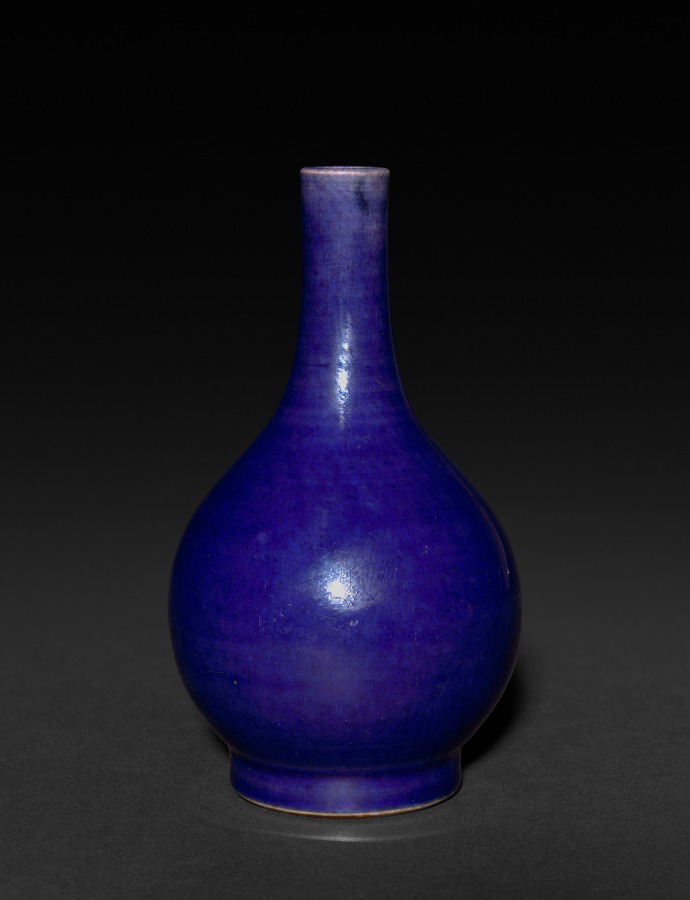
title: Bottle-Shaped Vase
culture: China, Qing dynasty (1644–1911), Qianlong reign (1736–95)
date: 1736–95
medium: porcelain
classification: Ceramic